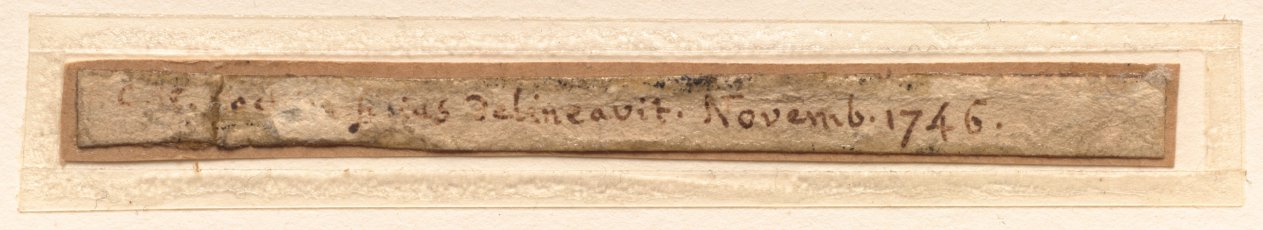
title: Funeral for Marie-Thérèse of Spain, Dauphine of France, in the Church of Nôtre Dame, Paris, on November 24, 1746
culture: France, 18th century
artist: Charles-Nicolas Cochin (French, 1715–1790)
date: c. 1746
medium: Pen and black ink and gray wash heightened with white gouache on cream laid paper, incised (with graphite) for transfer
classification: Drawing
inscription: on scrap of old mount, now removed, in eighteenth-century hand, in brown ink: C. N. Coc[hin] [abraded] filius delineavit. Novemb. 1746.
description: As an official draftsman to the king, Charles-Nicolas Cochin was responsible for documenting royal events, festivities, and ceremonies. When the Spanish princess Marie-Thérèse, wife of Louis XV’s eldest son, died in childbirth, she was given two lavish funerals: one at the Church of Saint Denis, and another, represented in this drawing, at Notre Dame in Paris. Cochin’s drawing shows how the interior of the gothic cathedral was theatrically redecorated in the current rococo style. Beneath the majestic canopy in the center of the nave, an ornate arched structure, a baldequin, contains the princess’s coffin.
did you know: Charles-Nicolas Cochin worked closely with the branch of the royal household charged with organizing and presenting royal ceremonies to produce prints such as the one related to this drawing.